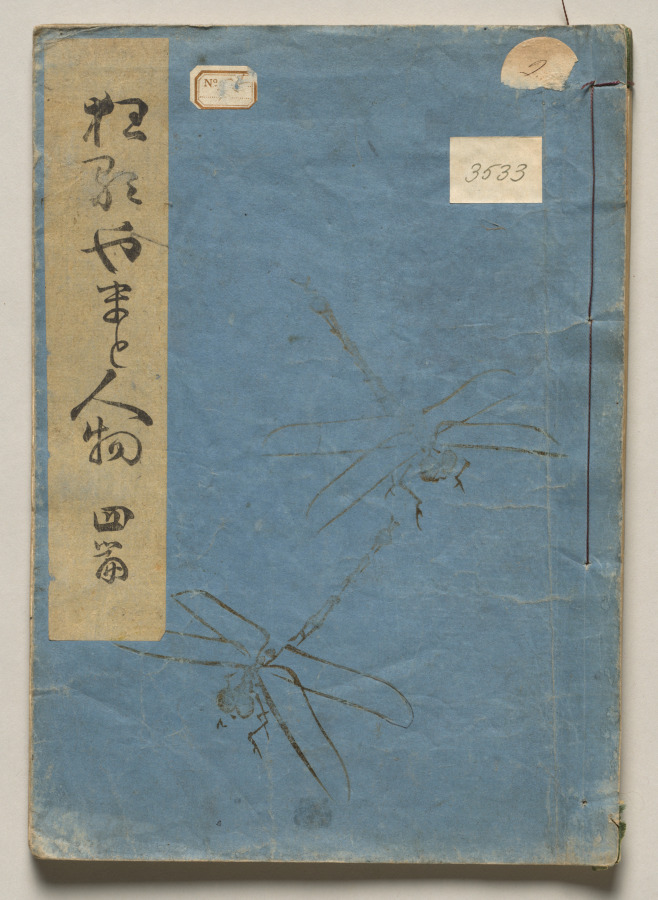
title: Volume Four of People of Japan in Light Verse (Kyōka)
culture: Japan, Edo period (1615–1868)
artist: Utagawa Hiroshige (Japanese, 1797–1858)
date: 1857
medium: Woodblock-printed book; ink and color on paper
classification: Bound Volume